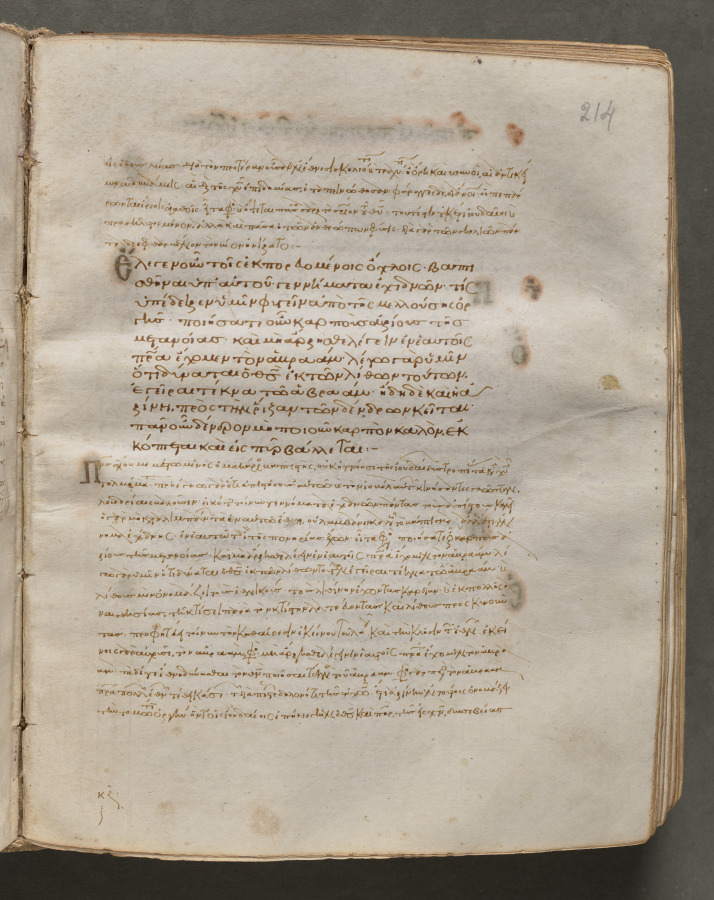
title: Text, folio 214 (recto), from a Gospel Book with Commentaries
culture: Byzantium, Constantinople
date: c. 1000–1100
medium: ink, tempera, and gold on vellum; leather binding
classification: Bound Volume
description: Each of the four gospels in this book opens on a page with brilliantly illuminated borders depicting the author of the text as well as birds-principally peacocks, symbols of the immortality of the soul-and fountains, representing the fountain of life and the salvation of the soul. This volume consists of 428 leaves with texts in Greek. Its level of sophistication suggests that it was probably written and decorated in a monastery in Constantinople.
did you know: Gospel Books were carried in procession through Byzantine churches.